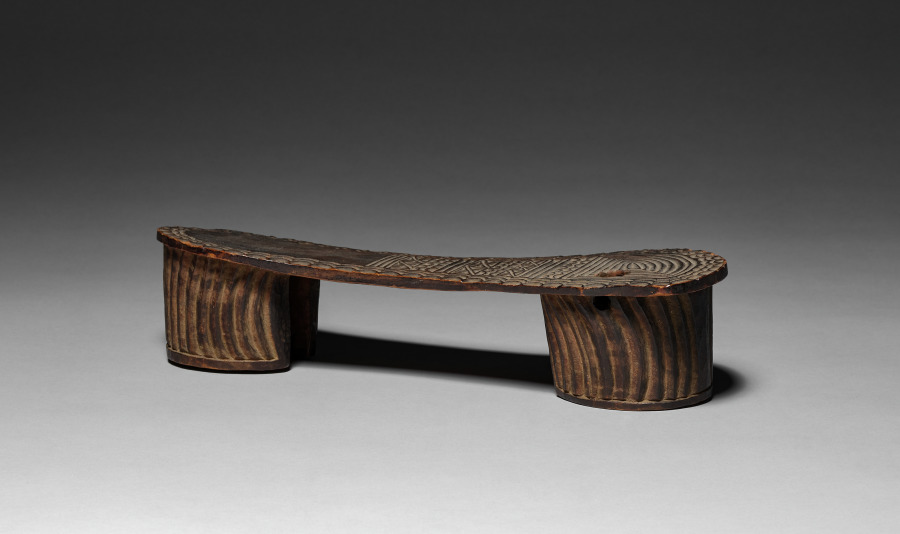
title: Sandal (mtalawanda / mtawanda) or Clog (kiatu cha mti)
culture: Africa, Central Africa, Democratic Republic of Congo, unidentified carver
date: c. 1800s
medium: Wood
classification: Wood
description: Common in the Indian Ocean region, wooden sandals changed meaning across place and time. This pair’s base elevates the foot as the toes grip an antelope-shaped peg (msuruaki). Crisp geometric sole designs suggest they were rarely worn. East African elites and merchants once had exclusive rights to wooden shoes, wearing elaborate ones only for portraits. Formerly enslaved people living along the coast wore simpler ones from the 1840s onward, adopting elite footwear to assert their liberation. However, slave traders like the Zanzibari “Tippu Tip” (c. 1832–1905) likely brought mitalawanda to Central Africa; stylistic elements of this pair hail from that region.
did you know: This distinctive footwear traveled from Southeast Asia and the Middle East to Africa, first to the Swahili coast and then further inland to parts of Central Africa. The deity Krishna wears similar shoes (paduka) in an 18th-century Indian miniature painting (2003.344).